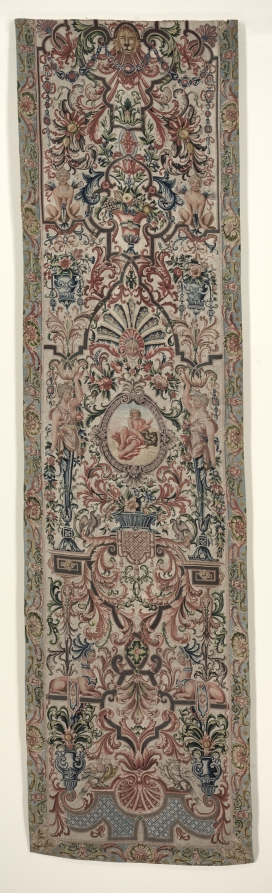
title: Needlework Bed Hanging (1 of 2)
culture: France, late 17th century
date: c. 1690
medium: petit point embroidery; silk and wool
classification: Embroidery